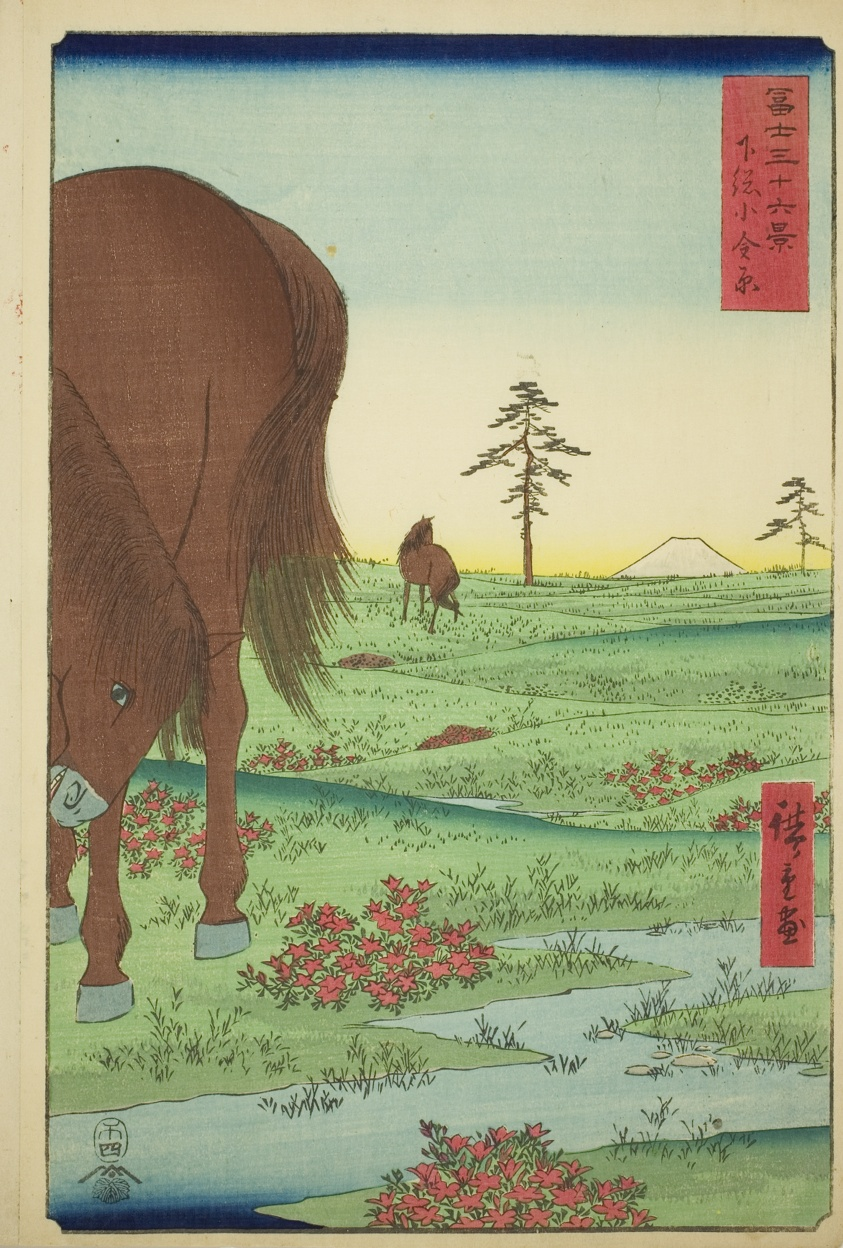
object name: Print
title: Kogane Plain in Shimosa Province (Shimosa Koganehara), from the series "Thirty-six Views of Mount Fuji (Fuji sanjurokkei)"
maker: Utagawa Hiroshige 歌川 広重; Japanese, 1797-1858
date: 1858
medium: Color woodblock print; oban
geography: Japan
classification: print; asian art